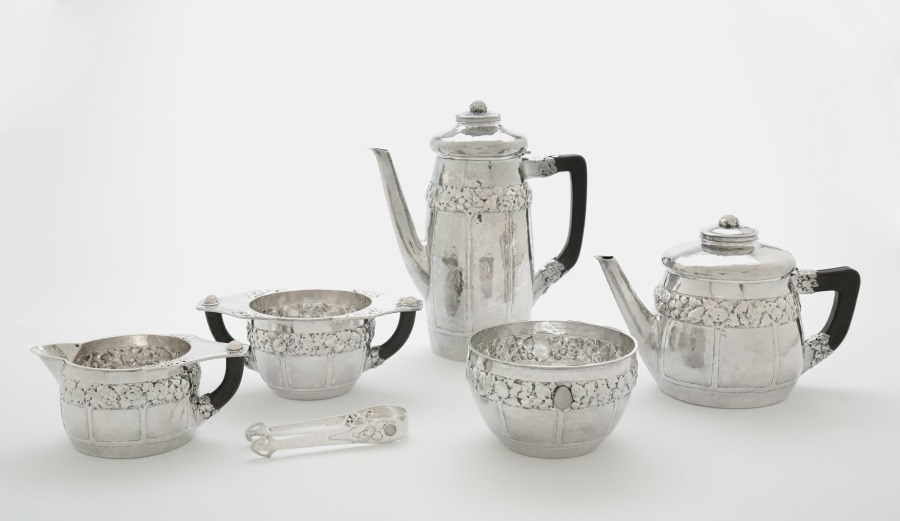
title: Coffee and Tea Service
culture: America, Ohio, Cleveland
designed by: Louis Rorimer (American, 1872–1939)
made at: and Rokesley Shop (American)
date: c. 1910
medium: silver, moonstones, ebony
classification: Silver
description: This tea and coffee service was designed for production by the Rokesley Shop, a collaborative group working at Louis Rorimer’s studio. Reacting against industrial mass production, Rorimer emphasized inventive design in finely crafted objects.